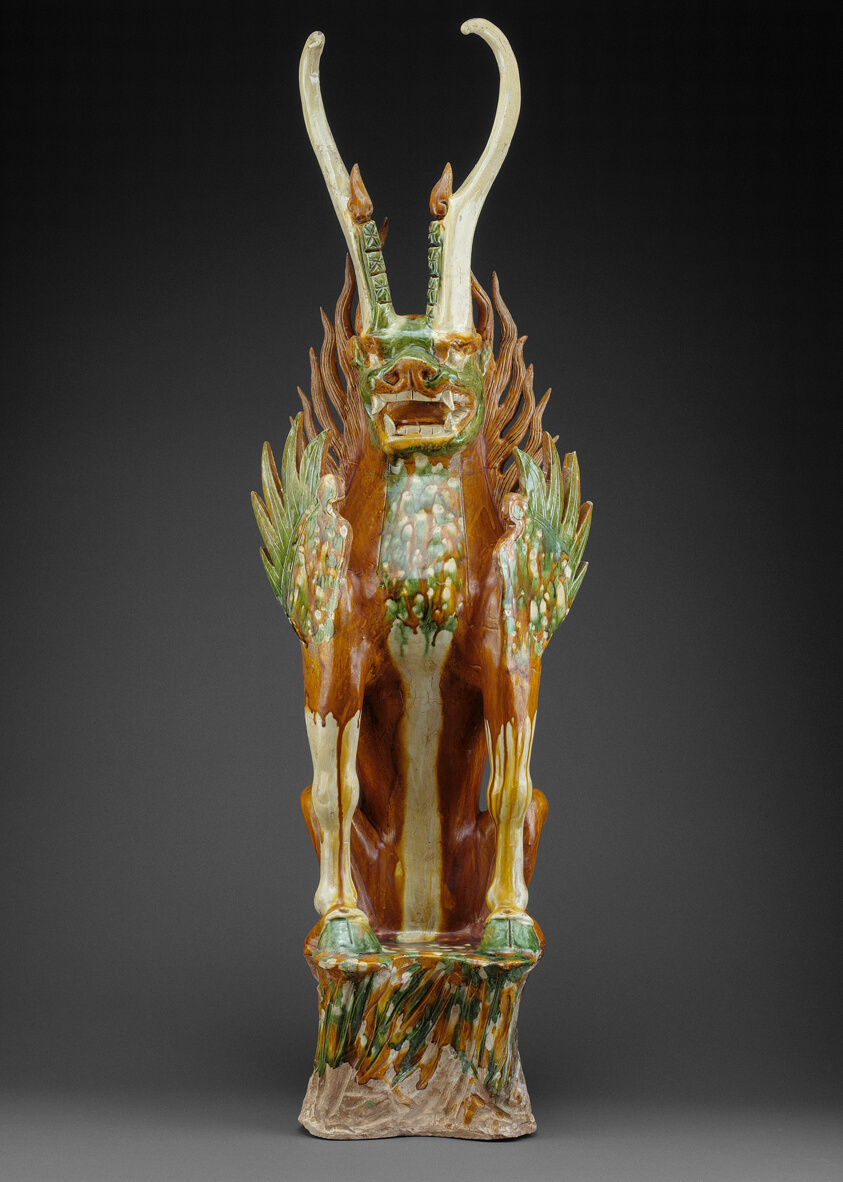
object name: Sculpture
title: Feline-headed Guardian Beast (Zhenmushou)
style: Chinese (culture or style)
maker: China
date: Tang dynasty (618–907), 1st half of 8th century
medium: Earthenware with three-color (sancai) lead glazes and traces of pigments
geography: China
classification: earthenware; asian art; ceramics; sculpture